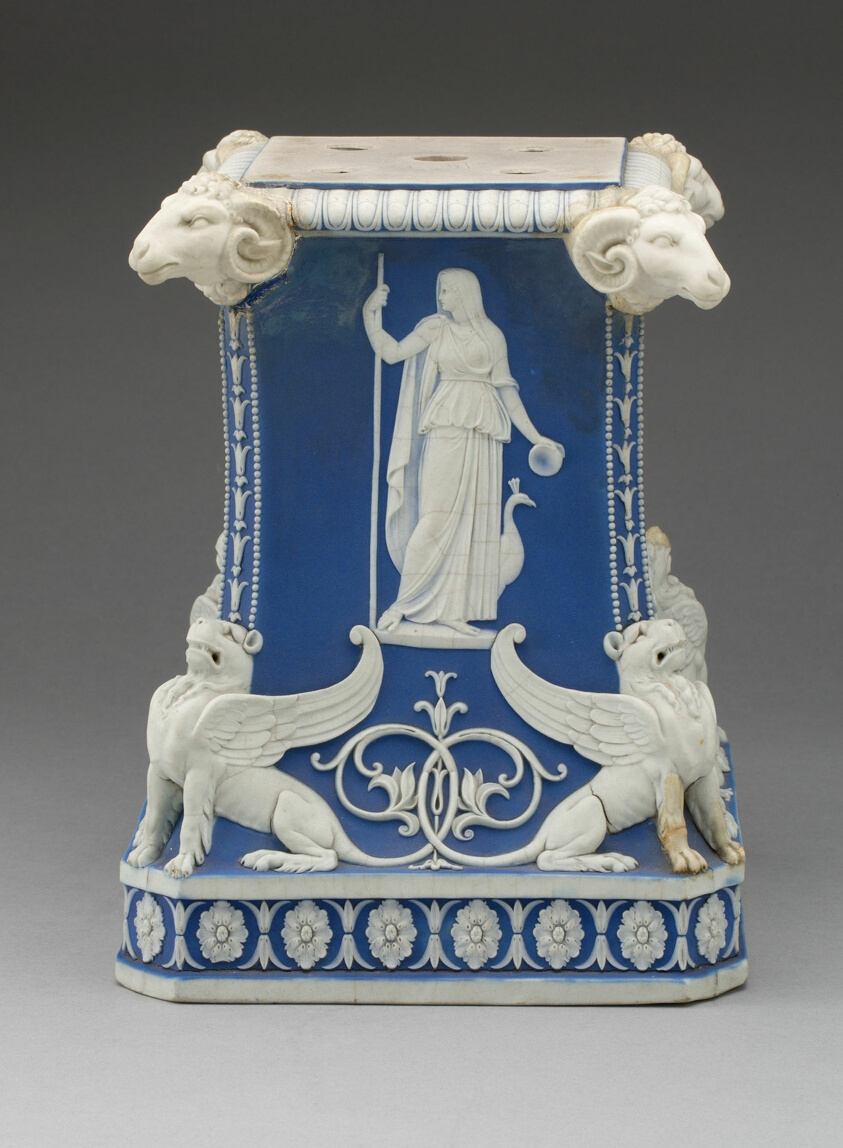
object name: Ceramics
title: Pedestal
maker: Wedgwood Manufactory (England, founded 1759)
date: c. 1785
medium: Stoneware (jasperware)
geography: Burslem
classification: ornamental piece; stoneware; european decorative arts; ceramics